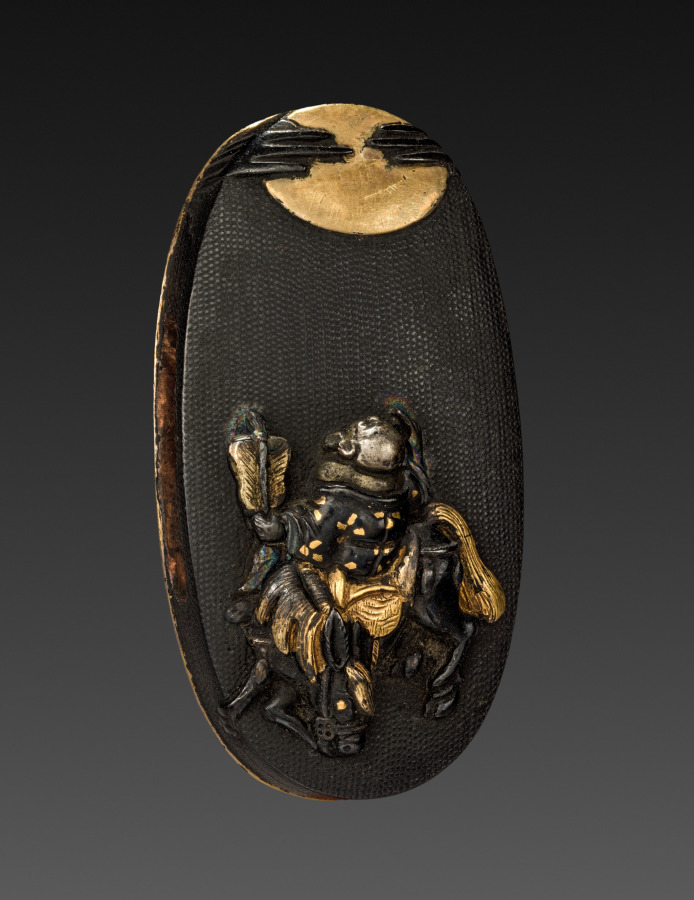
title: Sword-Hilt Pommel (Kashira)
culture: Japan, Edo period (1615–1868)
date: 1700–1850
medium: shakudo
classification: Arms and Armor